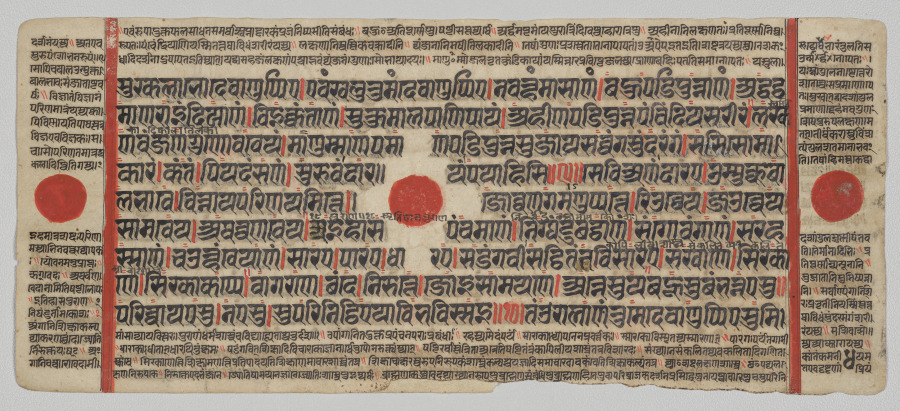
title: Text, Folio 4 (verso), from a Kalpa-sutra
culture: Western India, Gujarat, last quarter of the 15th century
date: c. 1475–1500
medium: Gum tempera, ink, and gold on paper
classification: Painting